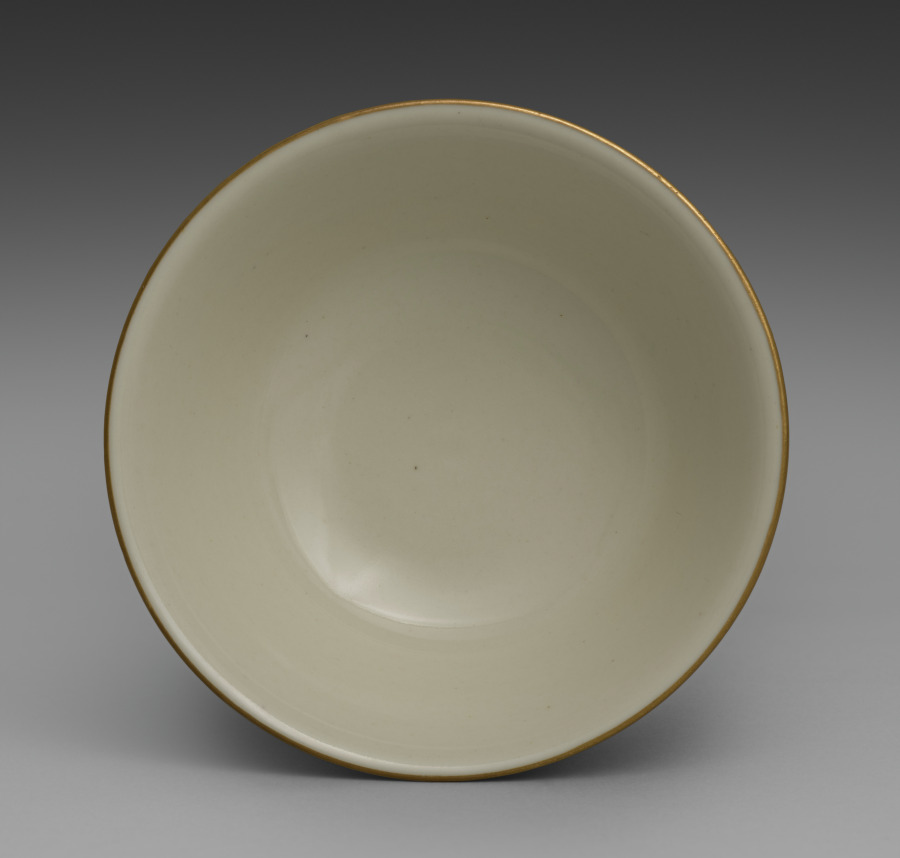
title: Bowl from Dining Set with Plum Blossoms and Cracked-Ice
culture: Japan, Meiji period (1868–1912)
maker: Seifū Yohei II (Japanese, 1844–1878)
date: c. 1875–78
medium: Porcelain with molded designs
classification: Ceramic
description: Each item in this set has a delicate low-relief design of flowering plum branches over scattered, intersecting lines meant to resemble the cracked-ice surface of a frozen body of water and is signed on the base in gold pigment. While Yohei II produced many fine works in underglaze blue, like those produced by Kiyomizu Shichibei, he also made works in quite different styles later in his career, from the early 1870 s. In 1873, he was appointed purveyor to the Industrial Center of Kyoto Prefecture, a designation associated with Kyoto’s efforts to reach an international market through the port of Kobe; and from 1875 until his death, he was involved in national-level projects to present Japanese ceramics across the world. It was during this period that Yohei III was apprenticed to Yohei II, and it has been suggested that this set may in fact be an early example of Yohei III’s work, which he signed with his teacher’s name. Decorated with flowers resembling Japanese textile motifs, the set calls to mind the design of Yohei II’s pair of vases with plum blossoms in the Victoria and Albert Museum. Here, the elaborate trees created for a formal public exhibition setting have been translated into the approachable blossoms of the genteel domestic environment. While the designs are consistent across the pieces, each raised flower petal and pistil and each incised line in the ice was done by hand, so the cups, bowls, and dishes are similar yet unique. The bottoms of two boxes once identified the set’s owner, but the information has been deliberately obscured with black ink. However, inscriptions still visible appear to indicate two occasions, once at the end of July 1886 , and once again in June 1916 , when parts of the set were requested from Hokura in Niigata Prefecture. The location corresponds to a neighborhood in the present-day city of Jōetsu. The surname Tsuji 辻 also appears on a paper tag affixed to one of the box cloths. Future research may possibly reveal more about their provenance. A vase by Yohei III in a private collection combines the formal grandeur of the Yohei II vases in the Victoria and Albert Museum with the gentler design of this dining set, placing flowering plum trees against soft, scalloped-edge clouds resembling those in golden screens.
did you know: The dining wares have a creamy white coloration that the four boxes containing them identify as Korean in style.